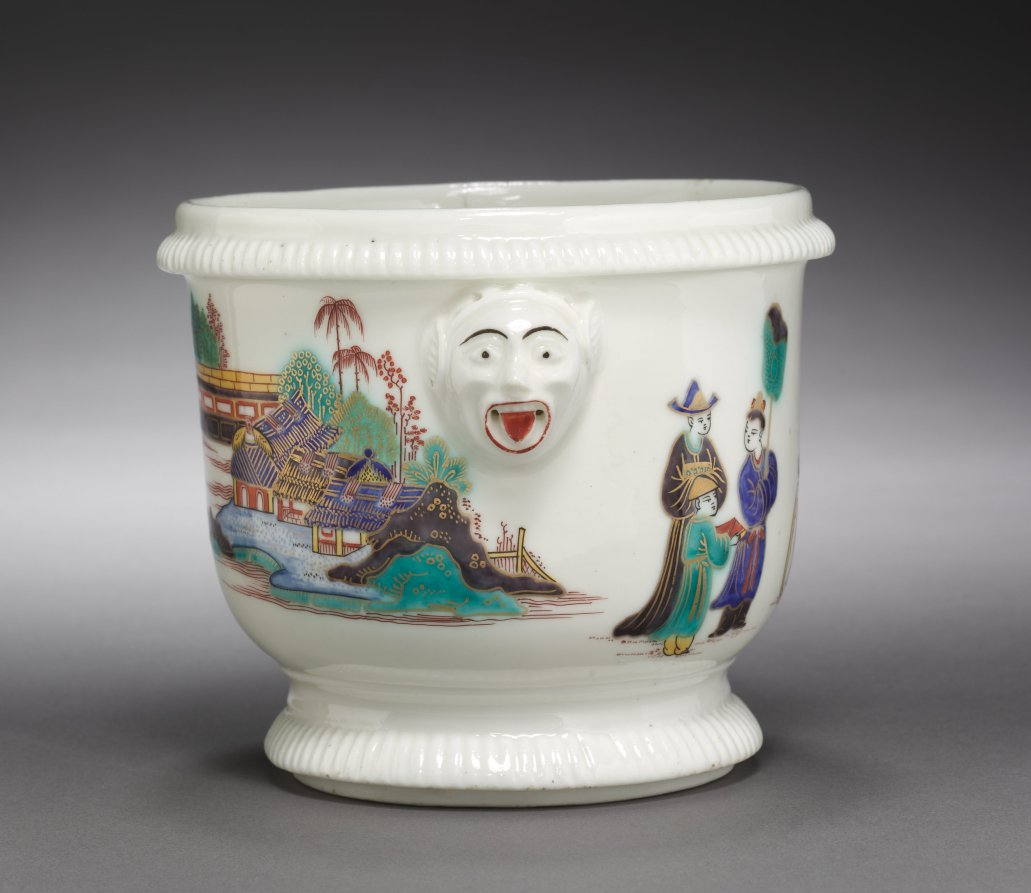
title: Bottle Cooler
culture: France, Saint Cloud, 18th century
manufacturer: Saint Cloud Porcelain Factory (French)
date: c. 1725– 1735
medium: soft-paste porcelain with enamel decoration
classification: Ceramic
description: The form of these cachepots is entirely typical of Saint-Cloud porcelain of about 1725. Their decoration, based upon Chinese porcelains of the so-called "famille-verte" type, is most unusual. Polychromed enamels were not often employed on Saint-Cloud porcelains, and figural scenes are very rare.